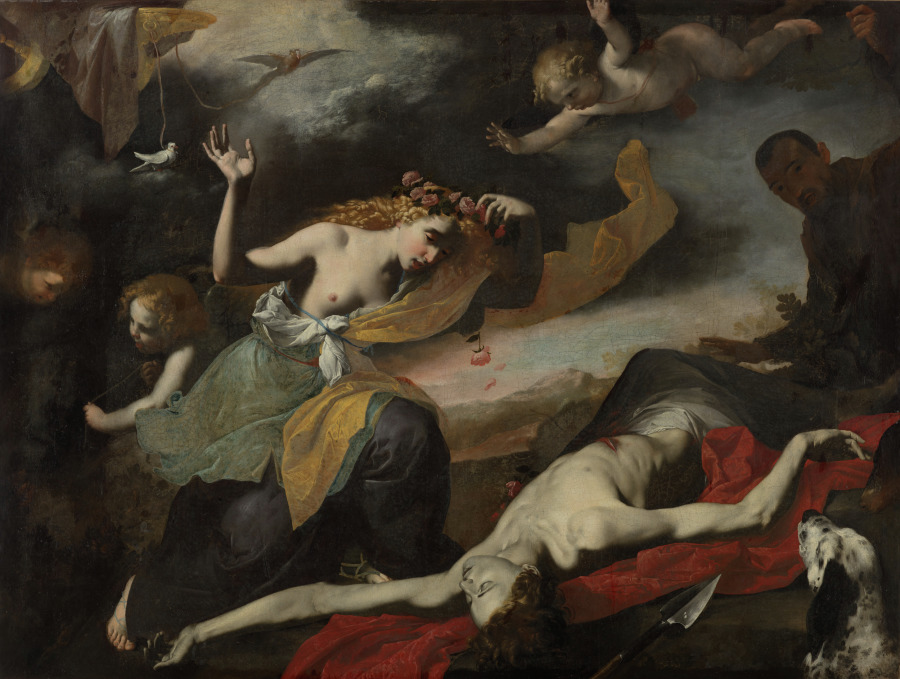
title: Venus Discovering the Dead Adonis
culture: Italy, Naples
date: c. 1650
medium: oil on canvas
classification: Painting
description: Venus, the goddess of love, urged her mortal lover Adonis to hunt only the easiest game. Yet he insisted on pursuing boar, which eventually gored him to death. In this scene, Venus discovers the young man robbed of his youth, yet the painting eternally preserves him in a state of perfection. This paradox corresponds to wordplay in Italian poetry from the 1600s, with which many artists sought visual parallels in their work. This painting derives from a 1623 poem by Giovanni Battista Marino. The painter remains unknown, although the sophisticated literary reference, dramatic use of light, and vivid use of color demonstrate the artist’s awareness of trends converging in Naples in the mid-1600s.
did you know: At left, two putti use a rope to restrain the boar that has just killed Adonis.